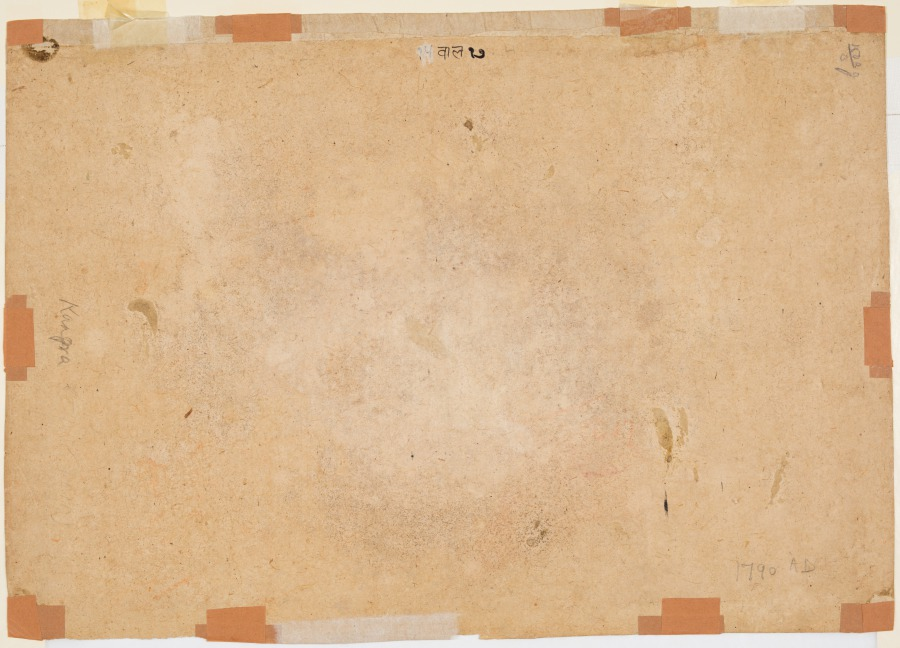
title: Feast where Vishnu decides he will incarnate as King Dasharatha’s sons, from Chapters 14–15 of the "Bala Kanda" (Book of Childhood) of a Ramayana (Rama’s Journey)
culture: Northern India, Pahari kingdoms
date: c. 1810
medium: Gum tempera and gold on paper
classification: Painting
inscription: [[verso]] vāla[kānda] 17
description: The women’s quarters of a palace occupy the right side of the composition. In the courtyard to the left, gods, including the blue Vishnu, four-headed Brahma, Surya (Sun), Chandra (Moon), Indra with eyes all over his body, and Shiva with snakes in his hair who sits with his minions, feast on food served on plates and bowls of leaves. Vishnu and Indra have taken off their crowns for the meal; the crowns are guarded on raised platforms in the background. The Pahari artist has depicted Dhaam, a local feast prepared by hereditary priest-chefs in accordance with strict Hindu rules of nutritional purity.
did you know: Vishnu and Indra have taken off their crowns for the meal; the crowns are being guarded on raised platforms in the background.